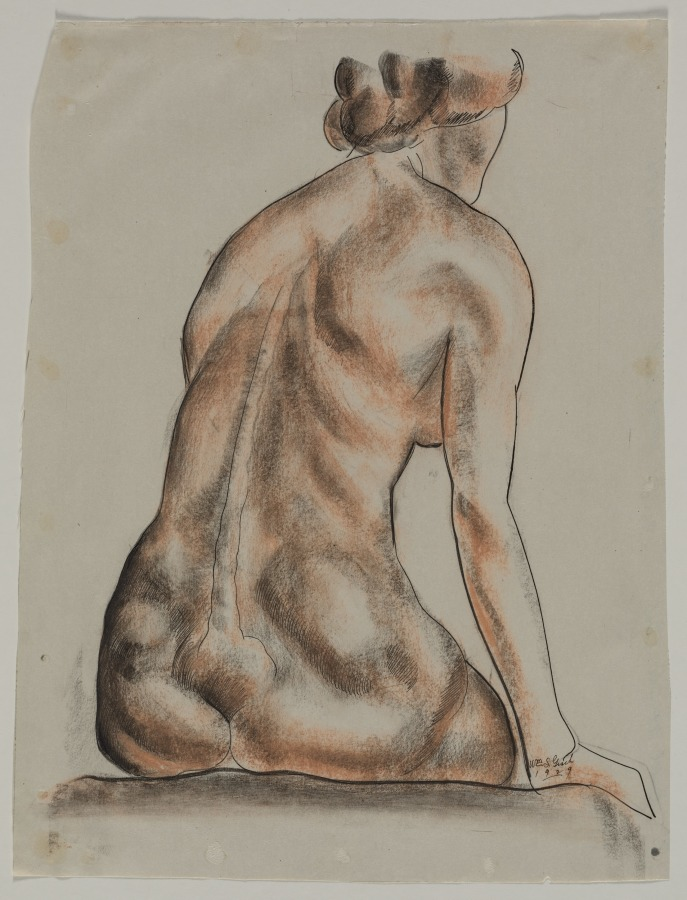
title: Model at the Club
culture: America, Ohio, Cleveland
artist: William S. Gisch (American, 1906–1989)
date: 1929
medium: pen and ink and brown and black chalk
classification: Drawing